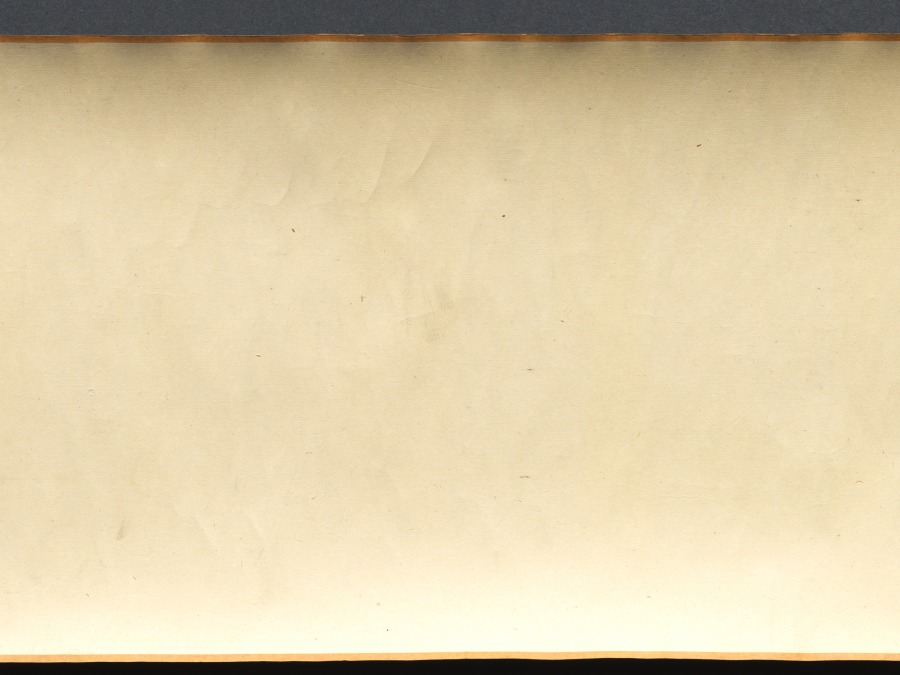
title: Flowers of Four Seasons, with Poems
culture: China, Ming dynasty (1368–1644)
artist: Wang Guxiang (Chinese, 1501–1568)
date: 1531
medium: handscroll; ink and light color on silk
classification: Painting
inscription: Artist's inscription, signature, and 15 seals. Ink Orchids. Sewn as pendants for the man of worth, swaying quiety, fragrance in the valley. [seal] Hsiao-chu ts'un Peony. Wiping his face, the young gentleman Ho [Ho Yen of Wei, Three Kingdoms] appears to have been powdered. His previous life was the perfume-stealing Han Shou [of Chin, 265–419 CE], the fragrance still lingers. [seal] Ts'un-wu chai. Flowering Crab Apple, New Bamboo. Shao-lin [Du Fu, 712–770] had to put down his brush. [Flowering Crab Apple]. Yü-k'o [Wen T'ung, d. 1079) in vain wrote poems about [Bamboo]. [seal] Yu-shih. Lotus Flowers. When she turns her head, half-hidden by a fan, and casts a glance, all the beautiful women become colorless. [seal] K'ang yüeh huai. Loquat. Ripeness in summer. [seal] Lu-chih. Pomegranate Flower. Whenever I remember you I will send my thoughts, but where have you gone--the [skirt] of pomegranate red? [seal] Wu-ho Sheng. Day Lily. Plant the day lily to forget sorrow. [seal] Yu-shih. Chrysanthemum. The untrammelled joy at the eastern fence. [seal] Lu-chih. Begonia. Comparing it to the beauties of Spring, and spreading them out as trimming for the stone steps. [seal] Yu-shih. Hibiscus. In recent years I have always enjoyed looking at flowers; instead of dark red I preferred pink ones. [seal] Jen-sheng i-lou. Narcissus, Camellia. The jade girdle left behind at Lo River. [Narcissus]. The precious pearls glitter before Spring. [Camellia]. [seal] Lu-chih. Heavenly Bamboo (Nandina domestica). A single branch in the wintry season. [seal] K'ang yüeh huai. Plum. Fragrant snow in the Lo-fou Mountains. [seal] Ts'un-wu chai. In the eleventh lunar month of the hsin-mao year of the Jiaqing era [1531], [I] imitated the boneless style of Yüan masters in sketching from life. Guxiang [seals] Yu-shih; Lu-chih. Translated by Wai-kam Ho/Lingyun Shih Liu (1980)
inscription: 2 colophons and 23 additional seals: 1 colophon dated 1632, and 2 seals of Li Jih-hua [Li Rihua] 李日華 (1565–1635); 1 colophon and 2 seals of Xiang Shengmo 項聖謨 (1597–1658); 3 seals of Liang Qingbiao 梁清標 (1620–1691); 6 seals of the Jiaqing 嘉慶 emperor (r. 1796–1820); 9 seals of Ch'eng Ch'i [Cheng Qi] 程琦 (1911–1988)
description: In this painting, flowers are loosely arranged by the seasons: narcissus and peony represent early spring; yellow loquat and lotus, summer; chrysanthemum, autumn; and the plum and evergreen bamboo, winter. The artist added to each flower a poetic line of calligraphy associating each plant with a historic or legendary figure. For example, the chrysanthemum, along with the line “The untrammeled joy at the eastern fence,” refers to the poet Tao Yuanming (died AD 427) who enjoyed chrysanthemums at the eastern fence in his garden. The scroll illustrates Wang Guxiang’s mastery of free brushwork, combining light monochrome ink with transparent colors. In his inscription, Wang says he used the “boneless” style without outlines as developed during the Yuan dynasty (1279–1368). Wang was a native of Changzhou, a city in southeast China known for its rich flora and fauna, and flower-and-bird painting tradition.